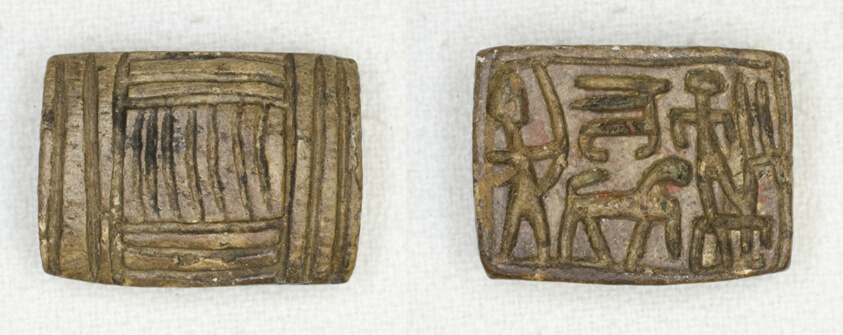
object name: Costume and Accessories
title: Plaque: Geometric design/hunting scene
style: second intermediate period, hyksos, egyptian, ancient, new kingdom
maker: Egyptian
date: Second Intermediate Period–early New Kingdom (about 1650–1295 BCE)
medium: Steatite?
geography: Egypt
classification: plaque (flat object); ancient art; costume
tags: hunting, Hieroglyphs